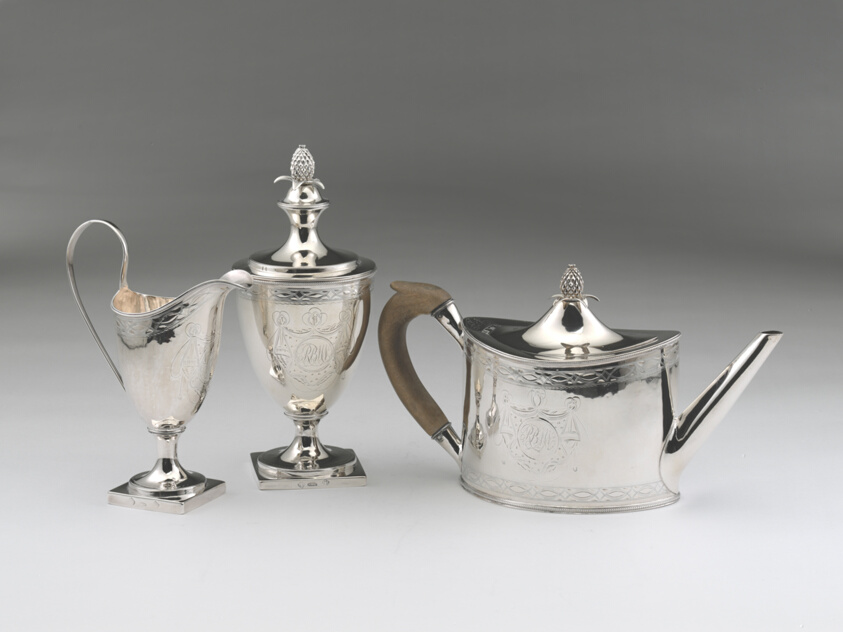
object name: Metalwork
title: Teapot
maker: Daniel Van Voorhis; American, 1751–1824; New York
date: c. 1793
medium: Silver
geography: New York City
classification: teapot; silver; american decorative arts; american arts; decorative arts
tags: dining, drinking